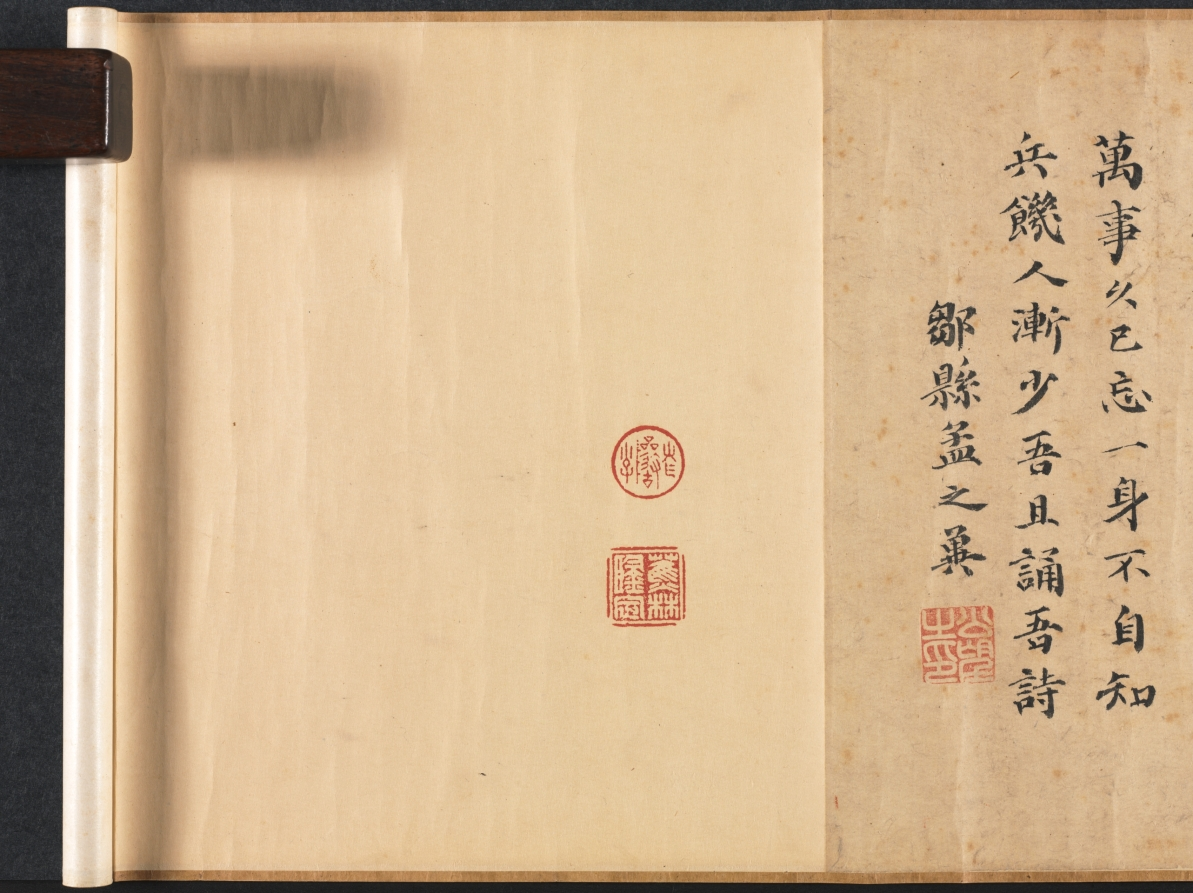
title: Leisure Enough to Spare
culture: China, Yuan dynasty (1271-1368)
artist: Yao Tingmei (Chinese, active mid-1300s)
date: 1360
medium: handscroll, ink on paper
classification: Painting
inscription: 至正廿年春正月_日作此併系鄙語于尾 地偏人遠閉柴關，滿院松陰白晝閒。 眼底風塵渾忘却，坐看流水臥看山。 吳興姚廷美畫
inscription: 23 colophons and 53 seals (dates unavailable for some): 1 colophon, dated 1360, and 2 seals of Yang Weizhen (1296-1370); 1 colophon and 3 seals of Wan Yi; 1 colophon of Zhang Junde; 1 colophon and 3 seals of Angji (act. ca. mid-14th c.); 1 colophon and 1 seal of Xu Shiquan; 1 colophon and 3 seals of Gao Yu; 1 colophon and 2 seals of Li Mingfu; 1 colophon and 2 seals of Lu Lin; 1 colophon and 1 seal of Zhang Qian; 1 colophon of Tao Tangwen; 1 colophon and 1 seal of Wu Yuangui (act. ca. 1300-60); 1 colophon of Bao Jiong; 1 colophon of Wang Zao; 1 colophon and 1 seal of Ma Chuyi; 1 colophon and 1 seal of Lin Yizhuang; 1 colophon and 1 seal of Gu Shunju; 1 colophon and 2 seals of Wang Jing; 1 colophon and 2 seals of Lin Shouchang; 1 colophon and 1 seal of Gao Zhidao; 1 colophon of Lin Xun; 1 colophon, dated 1359, and 2 seals of Meng Weicheng (act. mid-14th c.); 1 colophon and 1 seal of Meng Zhiji (act. mid-l4th c.); 14 seals of Liang Qingbiao 梁清標 (1620-1691); 1 poem dated 1755 and 5 seals of the Qianlong 乾隆 emperor (r. 1736-95); 2 seals of the Jiaqing 嘉慶 emperor (r. 1796-1821); 3 seals of the Xuantong 宣統 emperor (r. 1909-11).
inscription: Title on frontispiece by Zhang Bi 章弼: Signed Gongchen 拱辰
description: Seclusion and leisure—the ideals of the literati, or scholar-gentlemen—are expressed in this mature work by Yao Tingmei. The theme acquired special meaning at a time of the military uprisings near the end of the Yuan dynasty. Dedicated to an ascetic named Du, this work combines painting, calligraphy, and poetry; following the painting are more than 20 poems and essays written by notable scholars, one of whom was the calligrapher Yang Weizhen. It reveals not only the aesthetic taste of the literati but also the practice of contributing artistic and literary works to fulfill social obligations. Yao's painting demonstrates his individual style derived from various ancient masters (Guo Xi, Dong Yuan, and Juran). Yang Weizhen's calligraphy exhibits his bold, vigorous style and his intent to capture the spirit of antiquity in art.